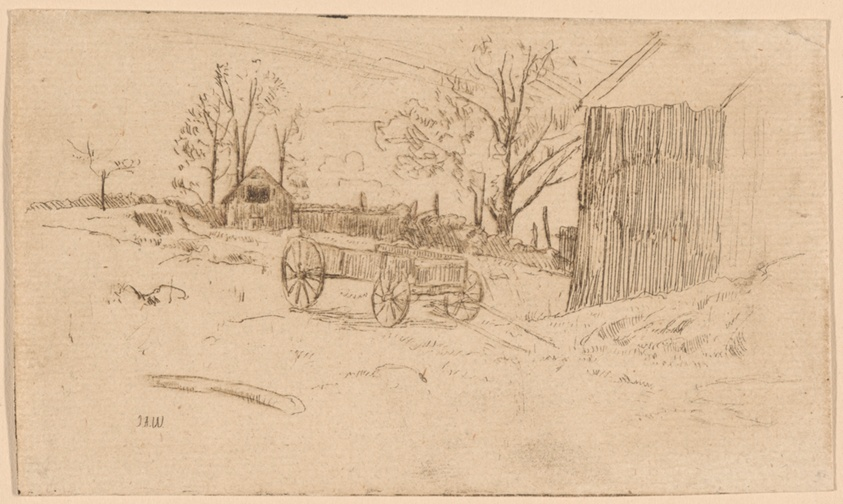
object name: Print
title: Roscoe's Barn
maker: Julian Alden Weir (American, 1852-1919)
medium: Etching in brown on cream laid paper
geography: United States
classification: prints and drawing; paper; print; etching